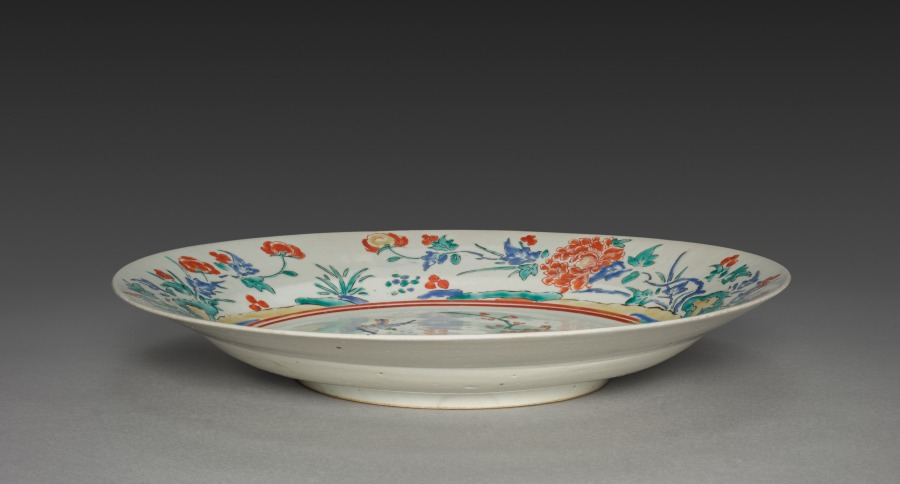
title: Dish with Birds and Flowers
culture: Japan, Edo period (1615–1868)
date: late 1600s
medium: porcelain with overglaze color enamel (Hizen ware, Kakiemon type)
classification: Ceramic